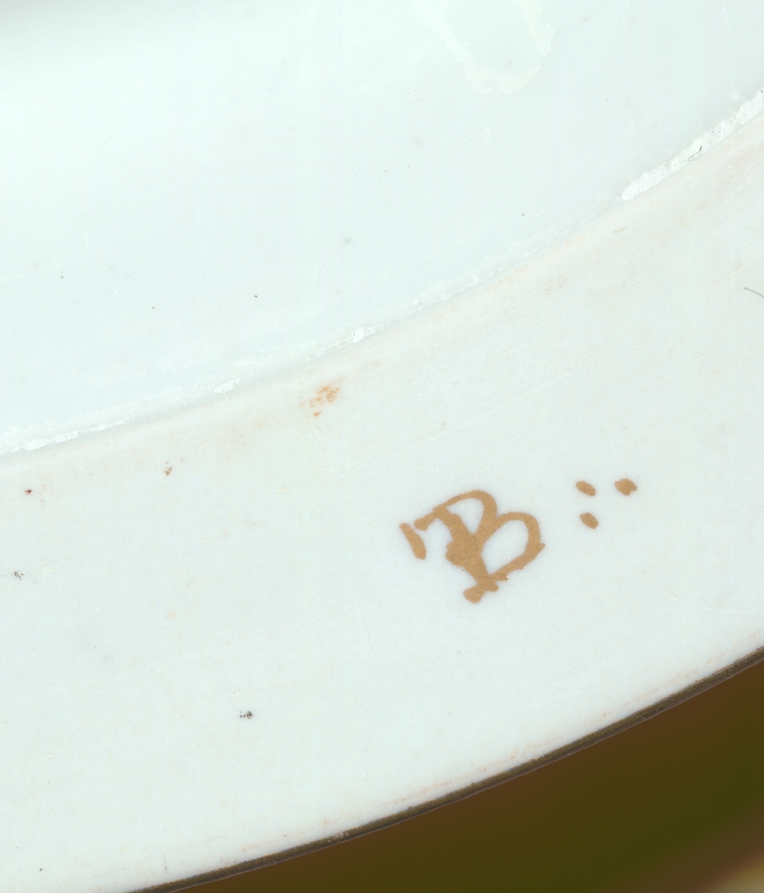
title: Standing Cup and Cover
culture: France, Sèvres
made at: Sèvres Porcelain Factory (French, est. 1756)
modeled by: Hyacinthe-Jean Regnier (French, 1803–1870)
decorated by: Francois-Hubert Barbin (French, 1786-)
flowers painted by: Jacques-Nicolas Sinsson (French)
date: 1844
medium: porcelain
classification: Ceramic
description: The official French porcelain factory at Sèvres has always been one of Europe's most important ceramic manufacturers, famous for its decorative pieces as well as more utilitarian wares. This vase in the Renaissance style, its design inspired by 16th-century French examples, is clearly in the tradition of elaborately conceived and decorated pieces intended for use by the French court or as presentation pieces by its monarchs. The latter was the fate of this Covered Cup, acquired in 1846 by Queen Marie-Amélie d'Orleans, the wife of Louis-Philippe, king during the July Monarchy (1830-48). Soon thereafter the vase was presented to a now unknown person. It is one of four pieces of this design made at the Sèvres factory, and the only one known today to have survived.